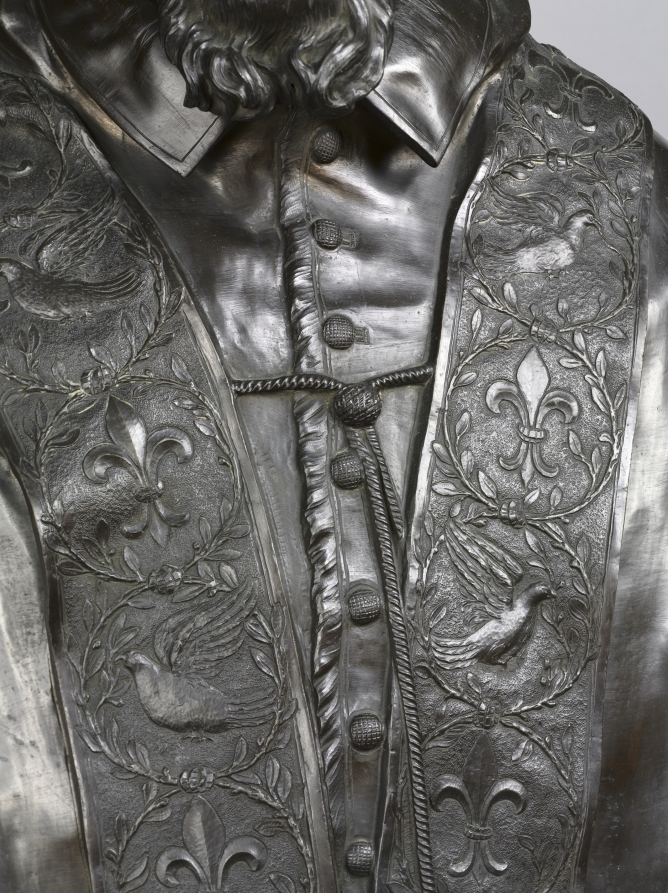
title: Portrait of Pope Innocent X Pamphili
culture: Italy, 17th century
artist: Alessandro Algardi (Italian, 1598–1654)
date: designed 1647–48; cast 1650–1700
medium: bronze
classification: Sculpture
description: Innocent X (Giovanni Battista Pamphili) was pope from 1644 until his death in 1655. Although he was not very interested in the visual arts, he followed tradition and gave several papal commissions for artistic projects. Algardi was the sculptor most frequently called upon by Innocent X. This sensitive portrait captures many details of the pope's costume as well as his intelligent, quiet face.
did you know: The pope's stole features Pamphili family emblems: fleur-de-lis and doves encircled by olive leaves.